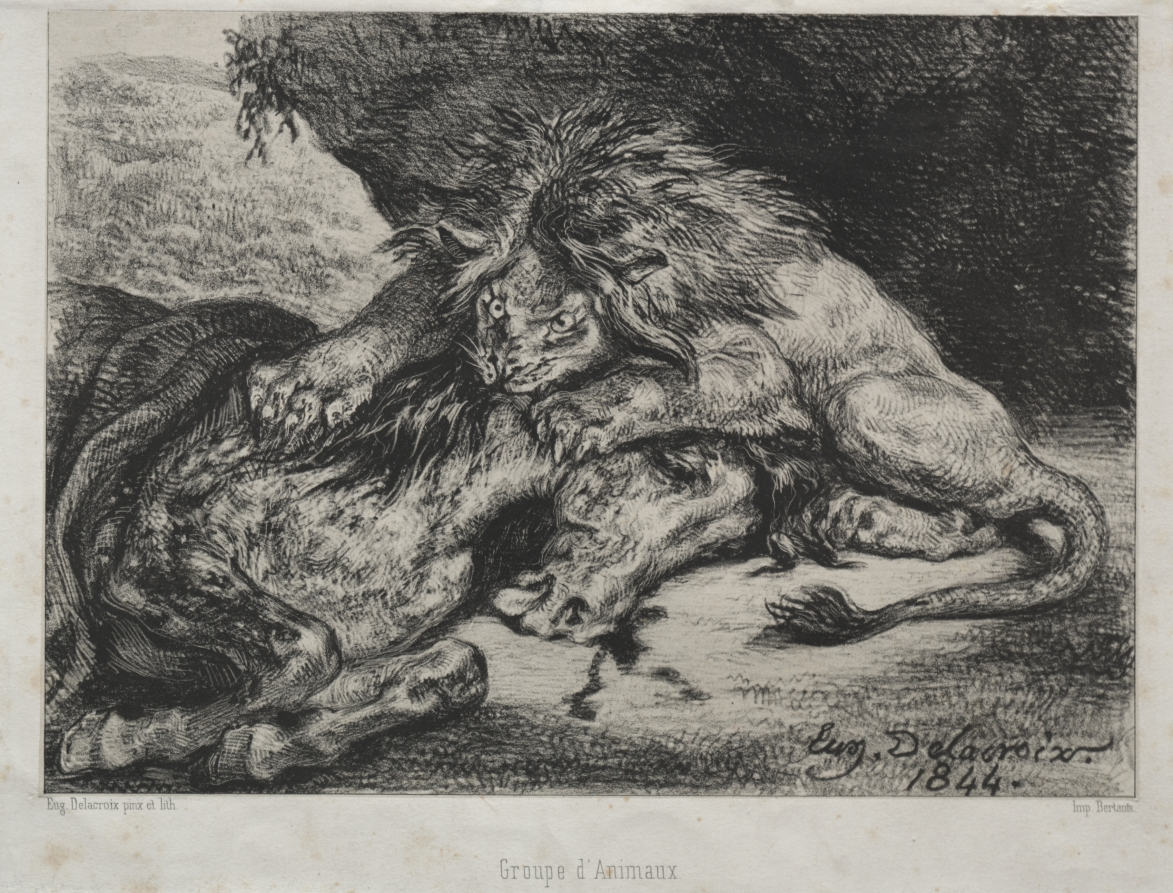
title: Lion Devouring a Horse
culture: France, 19th century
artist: Eugène Delacroix (French, 1798–1863)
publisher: Bertauts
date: 1844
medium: lithograph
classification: Print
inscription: signed and dated in stone, lower right: Eug. Delacroix 1844; lower left margin, printed: Eug. Delacroix pinx et lith.; lower right margin, printed: Imp. Bertauts; lower center margin, printed Groupe d' Animaux